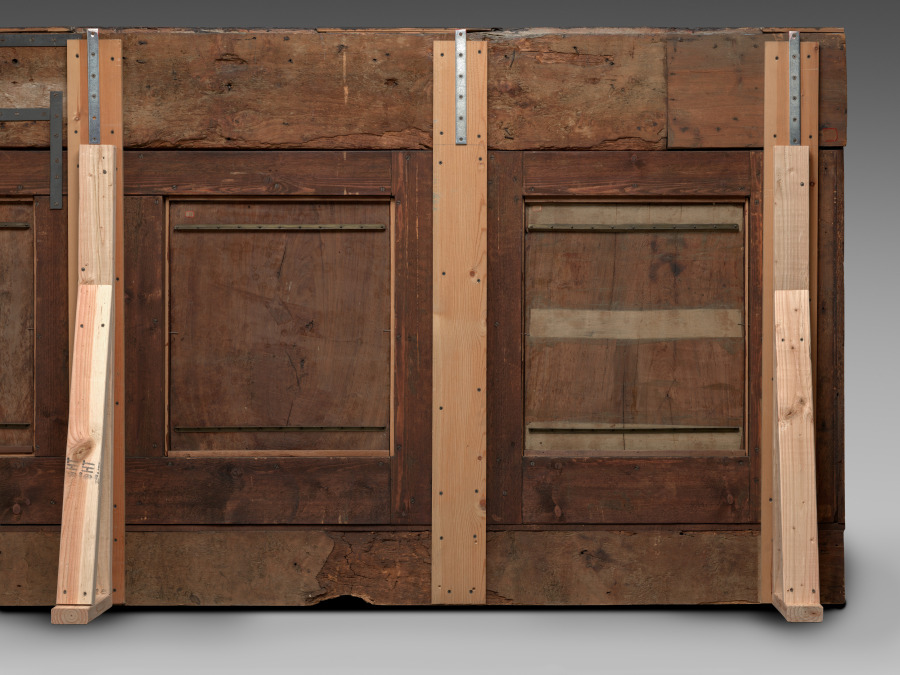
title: Upper Paneling from a Sacristy Armoire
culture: Italy, Florence, late 15th century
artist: attributed to Giuliano da Maiano (Italian, 1432–1490)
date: c. 1460–1475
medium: walnut, inlaid with holly and ebony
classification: Furniture and woodwork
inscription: in four of the five panels is the Medici badge of a jeweled ring wound with a ribbon or bannerole, on which is inscribed the motto "Semper." The frieze in the cornice contains part of a quotation from the Vulgate, Paul's epistle to the Romans, Chapter XI.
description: The imagery on the inset panels is the result of a technique known as intarsia, the skilled inlaying of woods of different colors to create a type of mosaic, popular during the 15th and 16th centuries in Italy for the decoration of paneling and furniture for studies, small rooms, and church sacristies. This large set of five intarsia panels comes from an unknown Florentine church. In its original setting the panels rested upon a row of similarly decorated cupboards (a sacristy armoire) which were used for the storage of liturgical vestments and books. This panel would have therefore been seen at eye level. The central panel depicts the Resurrection of Christ. The two outside panels depict the emblem of Lorenzo de Medici-three plumes encircled by a jeweled ring above a scrolling ribbon containing the Latin word SEMPER (Always). Lorenzo de Medici (1449-92) was the ruler of Florence when this sacristy armoire was constructed and was the likely patron. It seems to be the work of Giuliano da Maiano, an architect and intarsia-maker also responsible for the intarsia in the sacristy of Florence Cathedral.